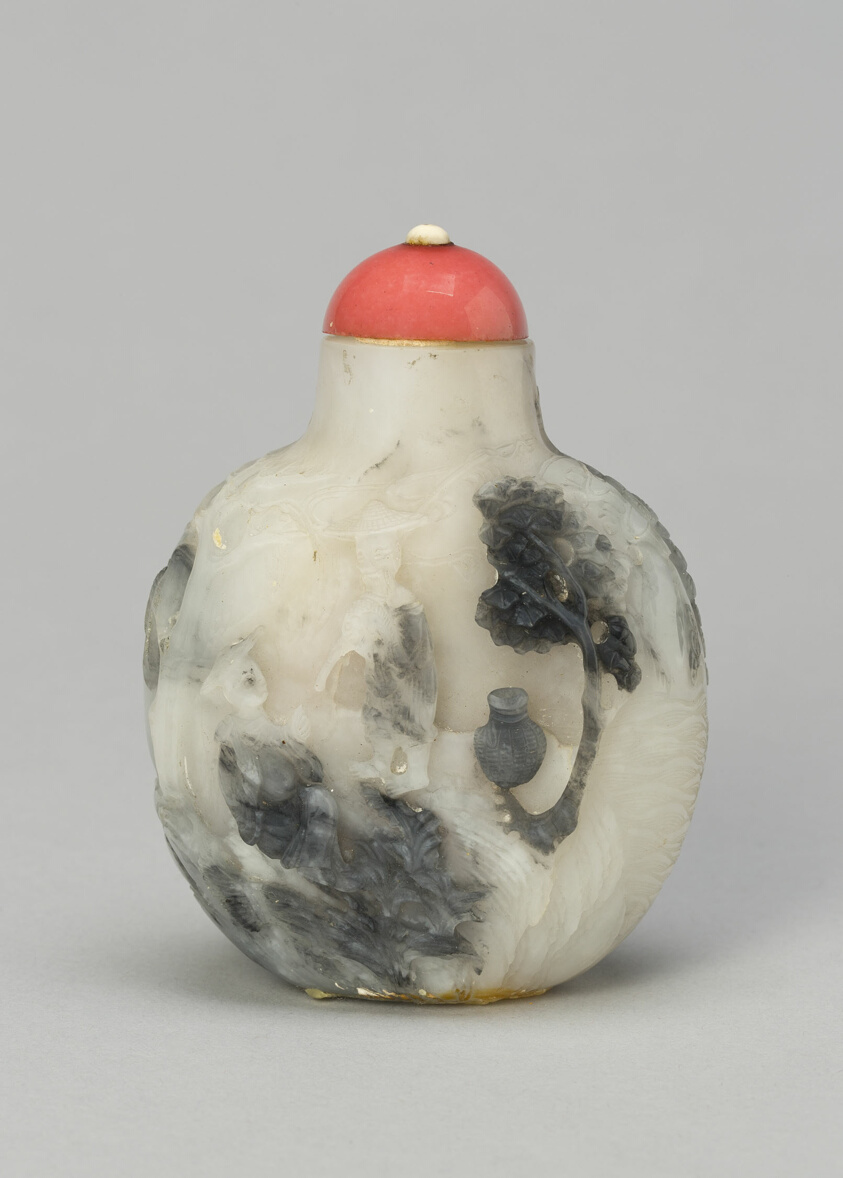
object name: Vessel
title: Snuff Bottle with Fishermen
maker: China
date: Qing dynasty (1644–1911), 1740–1800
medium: Suzhou grey and white jade (nephrite) with carved decoration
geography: China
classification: snuff bottle; asian art; vessel